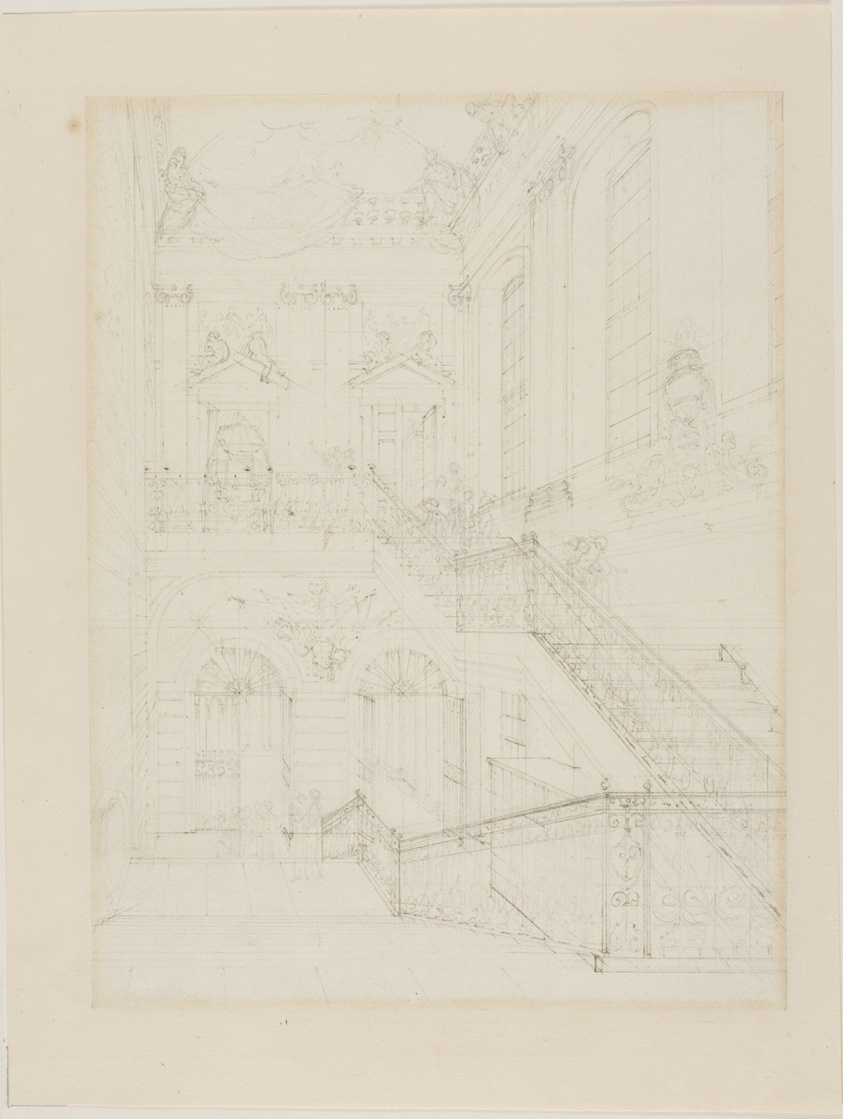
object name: Drawing and Watercolor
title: Study for The Hall and Staircase, British Museum, from Microcosm of London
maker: Augustus Charles Pugin (English, born France, 1762-1832); Thomas Rowlandson (English, 1756-1827)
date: c. 1808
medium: Graphite on ivory wove paper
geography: England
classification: graphite; drawings (visual works); prints and drawing